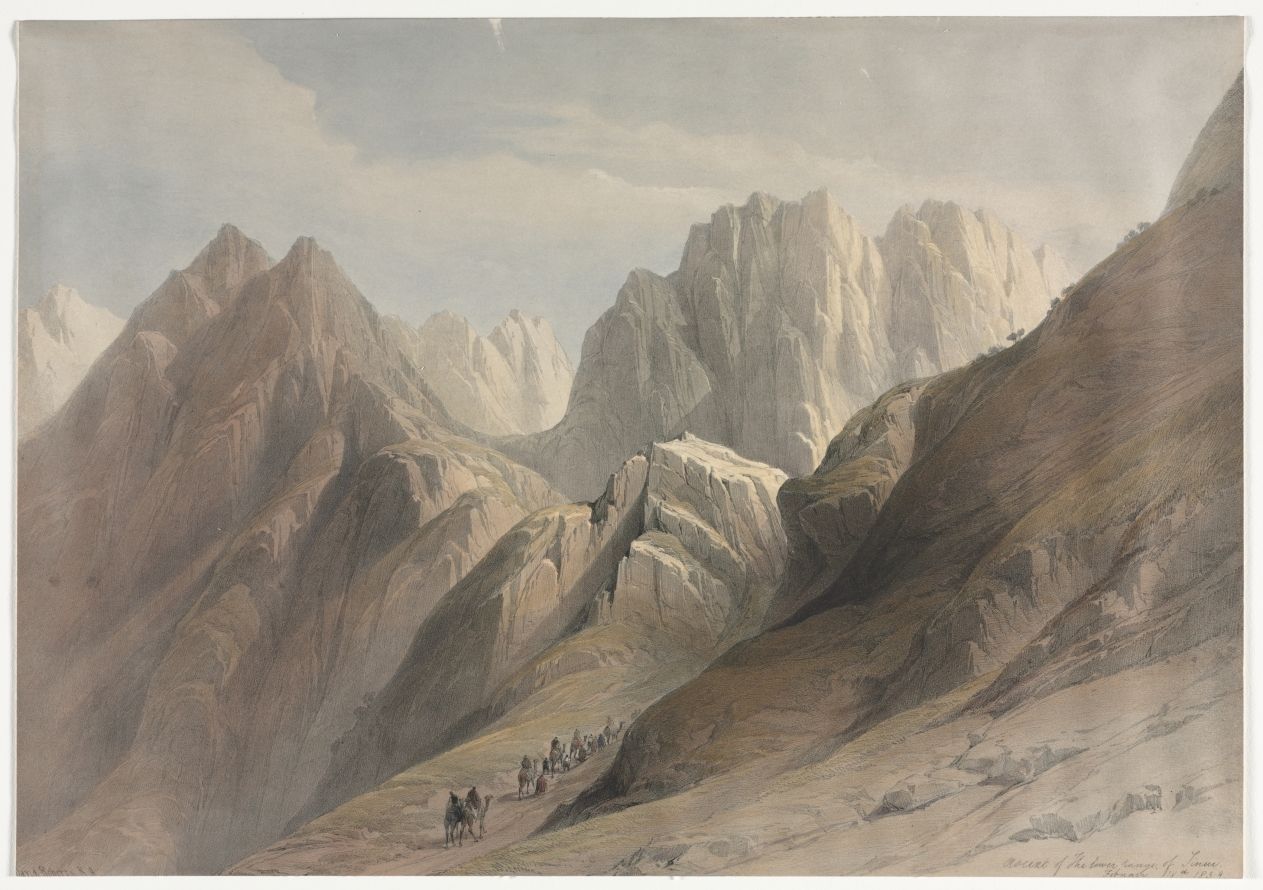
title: Ascent of the Lower Range of Sinai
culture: England, 19th century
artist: David Roberts (Scottish, 1796–1864)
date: 1839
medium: color lithograph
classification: Print